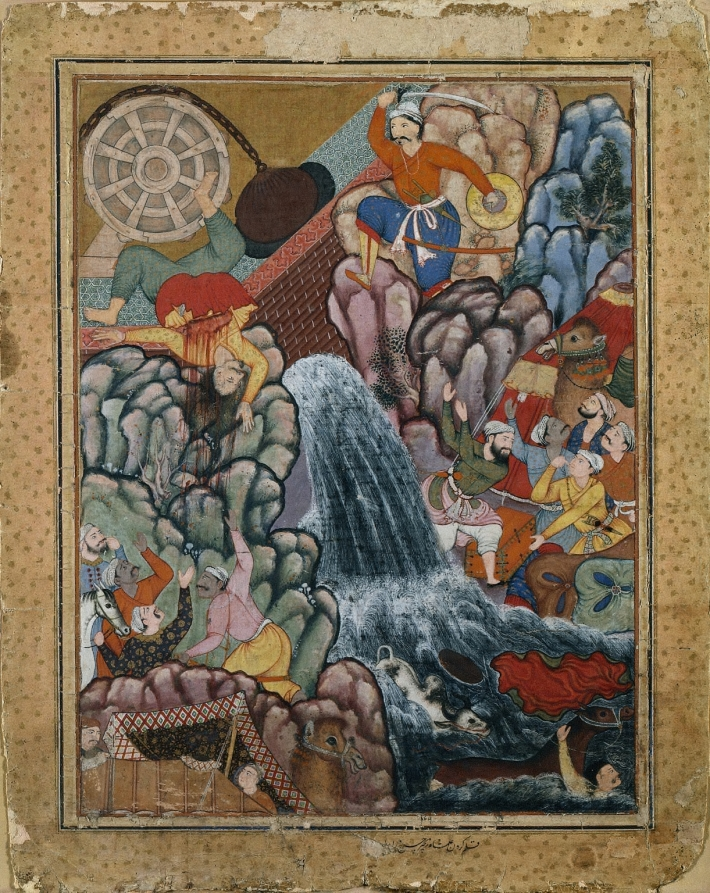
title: Alamshah cleaving asunder the chain of the wheel, from volume 11 of a Hamza-nama (Adventures of Hamza)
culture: Mughal India, court of Akbar (reigned 1556–1605)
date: c. 1560s–70s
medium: Gum tempera, ink, and gold on cotton and paper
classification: Painting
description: The hero, Alamshah the Greek, perches on a cliff above a rushing torrent of water. He has just slain the villain who raised the massive bronze plug on the dam in order to wash away the camp of Alamshah’s father, Hamza. The Hamza-nama recounts the adventures of an uncle of the Prophet Mohammed. It was the first major undertaking of the fledgling painting workshop created by Akbar. Originally in 14 volumes of 100 illustrations each, just a little more than 10 percent of the pages survive.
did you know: The title in the bottom margin is a continuation of the text on the previous page.